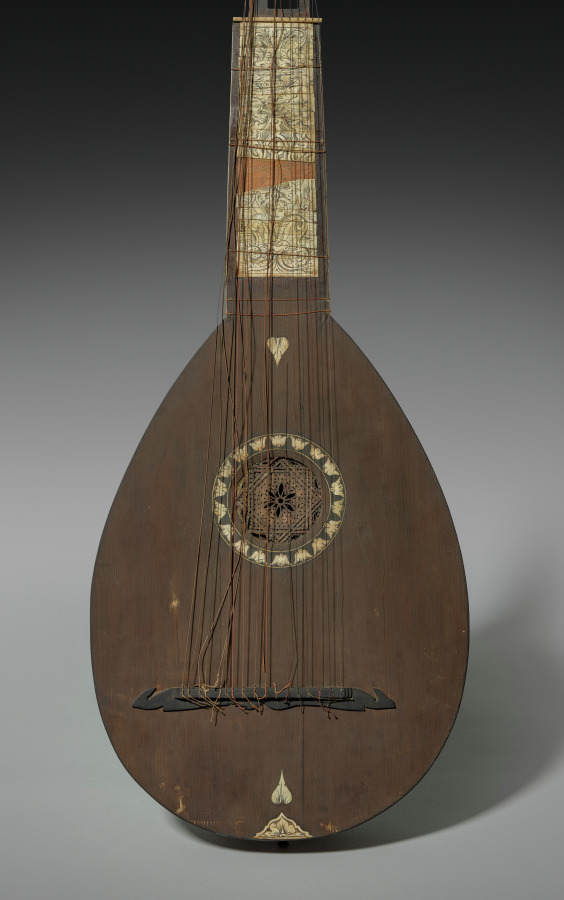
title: Chittarone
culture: Italy, late 17th century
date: late 1600s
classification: Musical Instrument